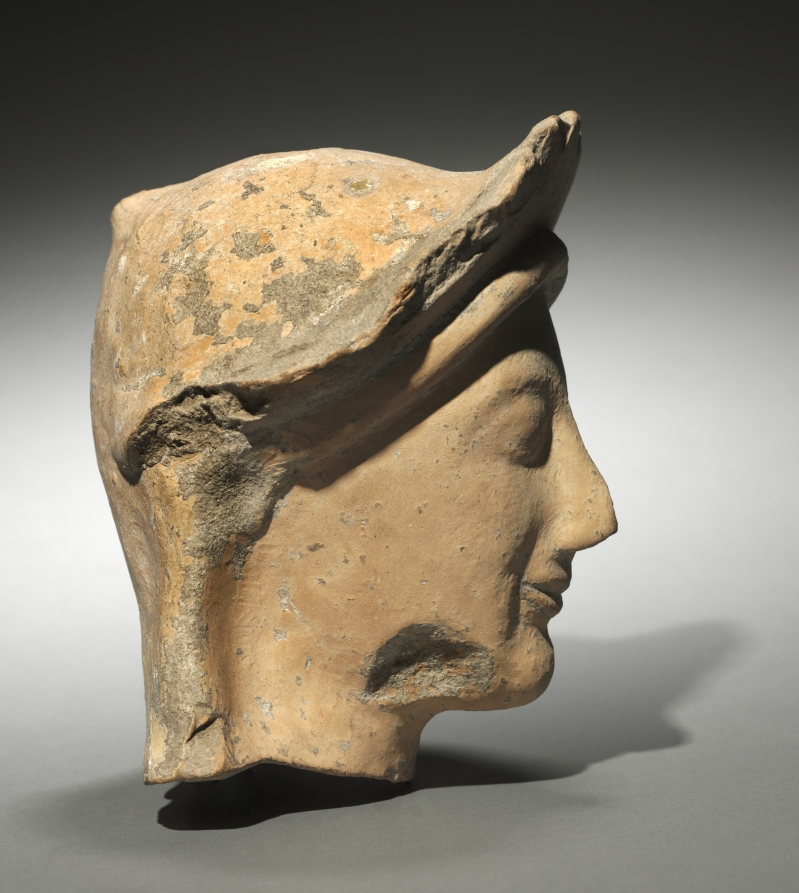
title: Woman's Head with Crown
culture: Greece, Sicily(?)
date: 500s BCE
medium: terracotta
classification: Sculpture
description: This terracotta sculpture depicts a woman with a wide headdress that is partly broken off. Her face is rendered in an Archaic style, with her mouth and eyes in low relief and her lips lifting upward in a serene smile. Originally, details such as the eyes and decoration on the headdress would probably have been painted on the surface of the sculpture.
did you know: In ancient Greek sculpture, a wide crown often denoted a matron deity like Hera or Demeter.